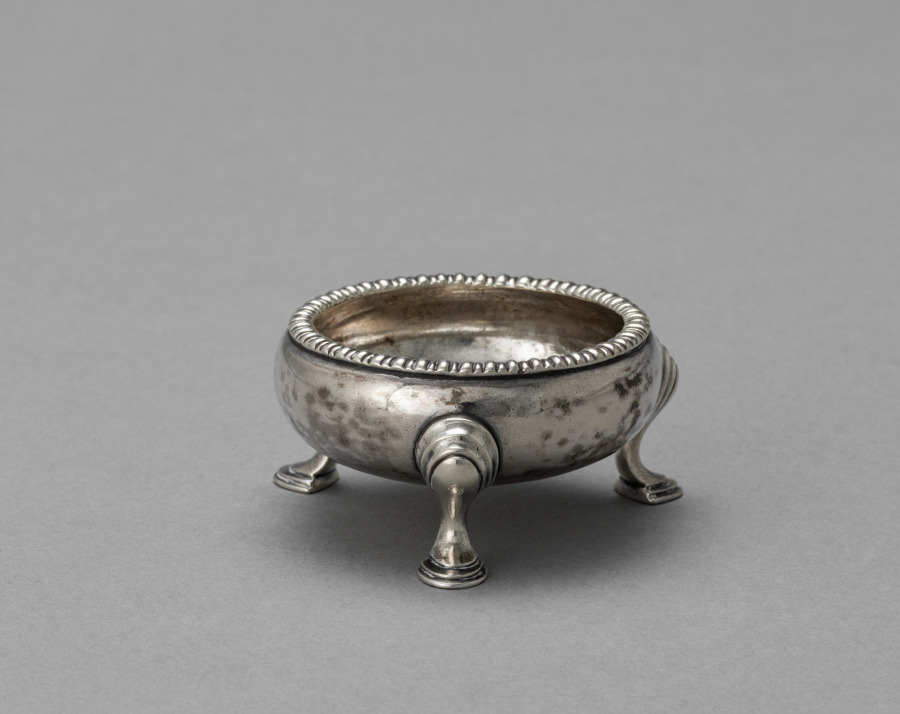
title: Salt Cellar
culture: America, Massachusetts, Salem, 18th century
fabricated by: John Andrew (American, 1747–1791)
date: c. 1770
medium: silver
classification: Silver